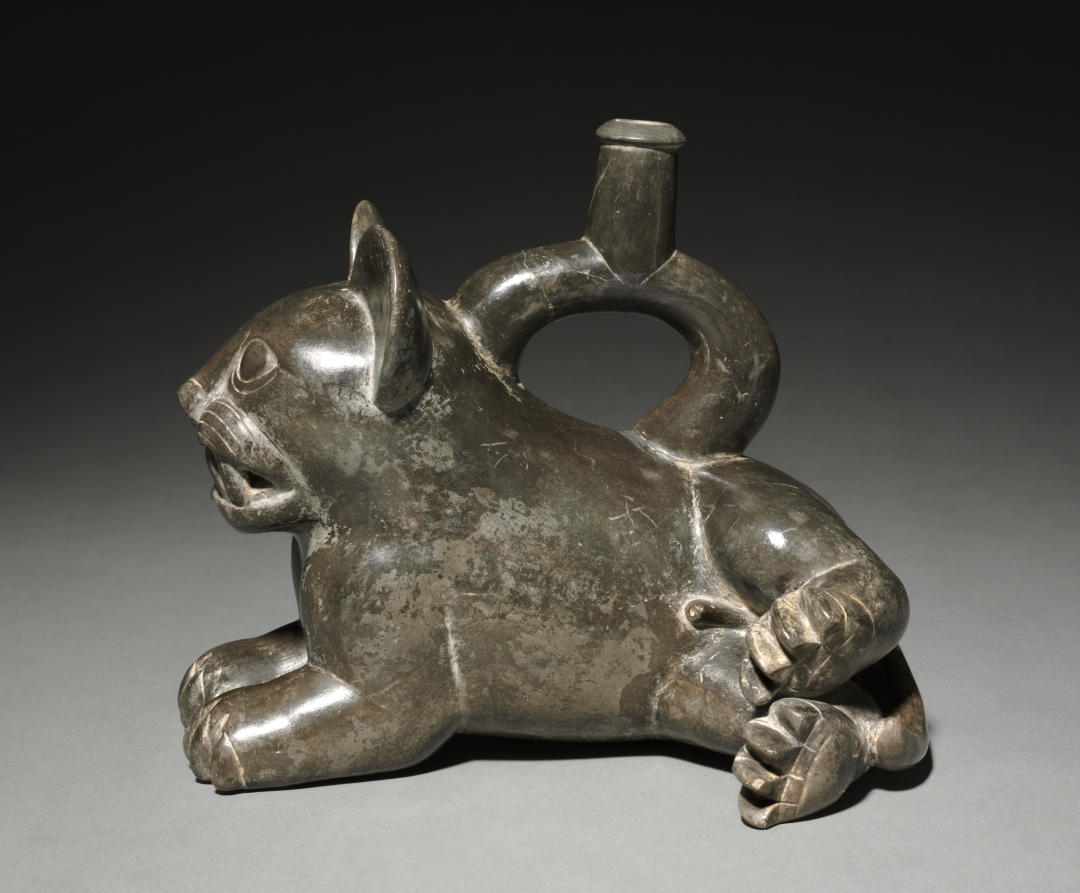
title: Feline Vessel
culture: Central Andes, North Coast, Moche people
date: 200–850 CE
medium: ceramic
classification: Ceramic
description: This darkware vessel is early Moche and demonstrates the transition from earlier North Coast cultures, which used smudge firing and post-fire pigmentation, to Moche times, which saw the adoption of new, higher-oxygen firing technologies and the use of slips applied before firing.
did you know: The Moche were known for their fine animal representations.